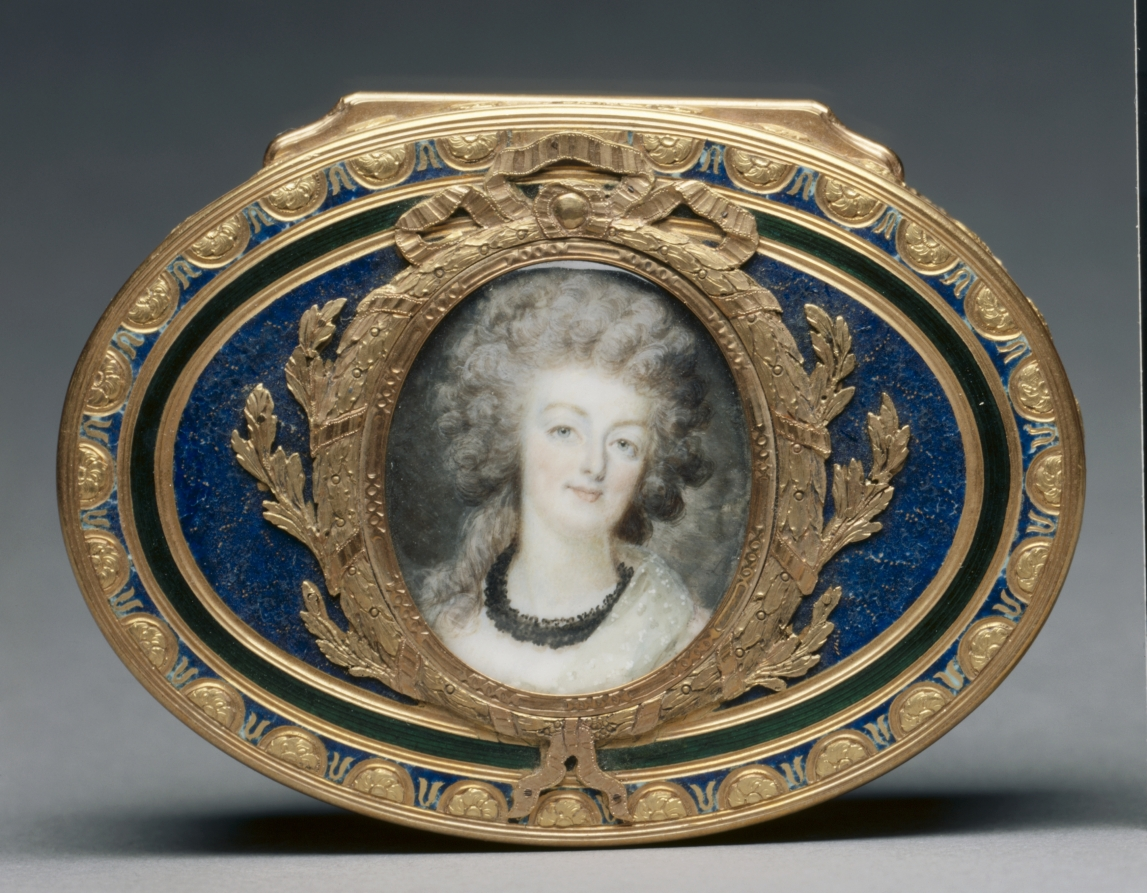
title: Snuff Box (Tabatière) with Portrait of Marie Antoinette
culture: France, 18th century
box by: Pierre-François-Mathis de Beaulieu (French)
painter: François Dumont (French, 1751–1831)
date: 1768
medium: watercolor on ivory in a gold and enamel box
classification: Enamel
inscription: [Maker's mark of Pierre-François-Mathis de Beaulieu, master goldsmith in 1768, inside cover]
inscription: [Charge mark of Jean-Jacques Prévot, 1762-1768, inside cover]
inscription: [Warden's mark of Paris, 1768-1769, inside cover]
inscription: [Discharge mark of Julien Alaterre, Paris, 1768-1774, on neck at right]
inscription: [Inside box, the letter]: "F"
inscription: [On bezel at left, engraved number]: "627"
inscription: [On front of bezel, engraved signature]: "Ve Georges Beaulieu à Paris"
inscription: [On right of miniature portrait, the letter]: "D"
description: This box was created through the collaboration of two skilled and well-known artisans of the period, master goldsmith Pierre-François-Mathis de Beaulieu and celebrated miniature painter François Dumont. The portrait of Marie Antoinette on the box's lid is painted in Dumont’s own style while those on the sides and bottom of the box take inspiration from the work of painter François Boucher, known for his pastoral scenes in the Rococo style.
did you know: Marie Antoinette, queen consort of French King Louis XVI and great patron of the decorative arts, was executed in 1793 at the end of the French Revolution.